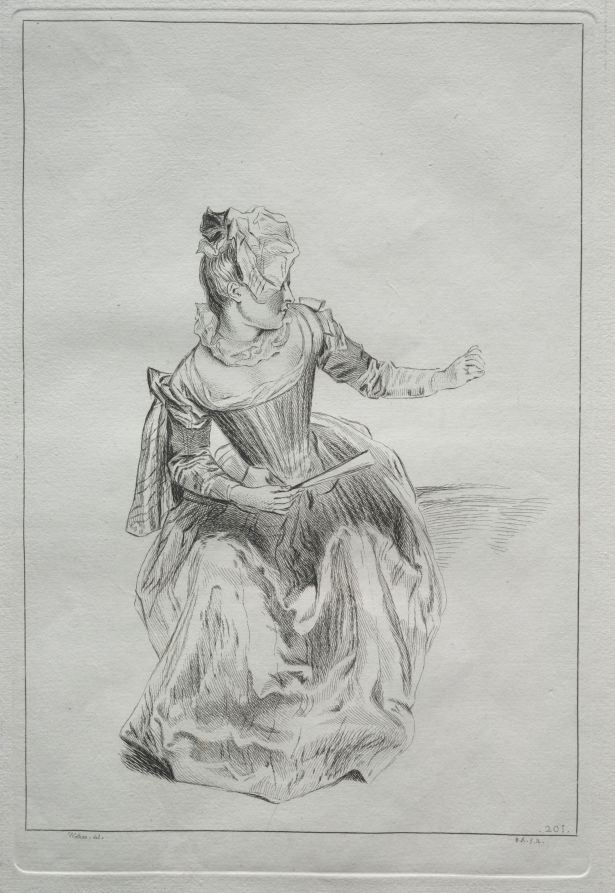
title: Woman Holding a Fan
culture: France, 18th century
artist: possibly by Benoit II Audran (French, 1700–1772)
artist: after Jean-Antoine Watteau (French, 1684–1721)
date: 1700s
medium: etching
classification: Print